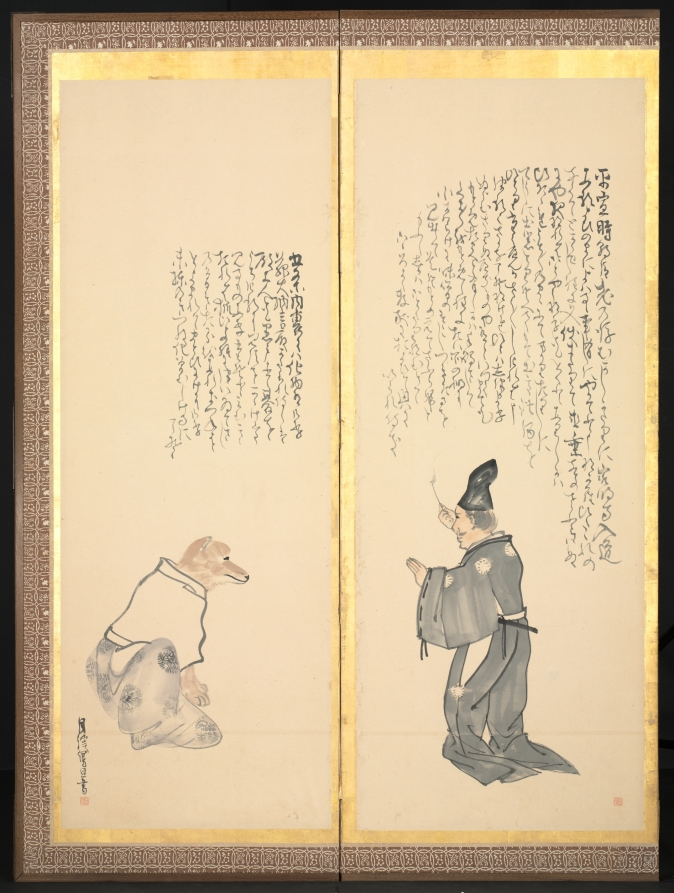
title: Scenes from Essays in Idleness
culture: Japan, Edo period (1615–1868)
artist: Matsumura Goshun (Japanese, 1752–1811)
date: late 1700s–early 1800s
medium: One of a pair of six-panel folding screens; ink and color on paper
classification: Painting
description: Matsumura Goshun inscribed passages from Buddhist monk Yoshida Kenkō’s (1283–1350) well-known collection of anecdotes, Essays in Idleness, across the top of the panels of this screen and its pair. Goshun illustrated the narratives with his vision of the figures who feature in them. The texts cascade down from right to left, forming unique compositional relationships with the images below. The episodes offer a veritable portrait of human idiosyncrasy, from one man’s deep faith in radishes to another’s inability to avoid nicknames.